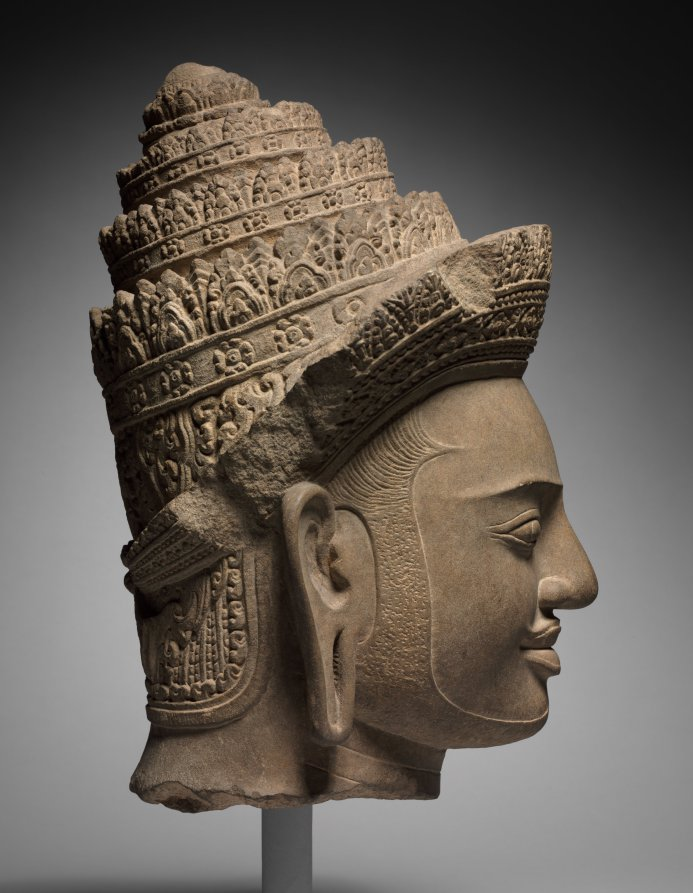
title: Head of a Deity or a Deified King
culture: Cambodia, Koh Ker, Reign of Jayavarman IV, 928-941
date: mid-900s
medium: sandstone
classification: Sculpture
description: The diadem is depicted tied to the intricate tiered headdress worn only by a god or king. Without further attributes, the identity cannot be known. Khmer sculptors of the 10th century emphasized powerful forms and extroverted expressions. The incised pupils suggest that this sculpture underwent the ritual of awakening, in which the eyes were added last. The royal head on the left is from a temple dedicated to Shiva, which was established by the Khmer king Jayavarman IV (928–942) in his remote capital of Koh Ker, 100 miles north of Angkor.